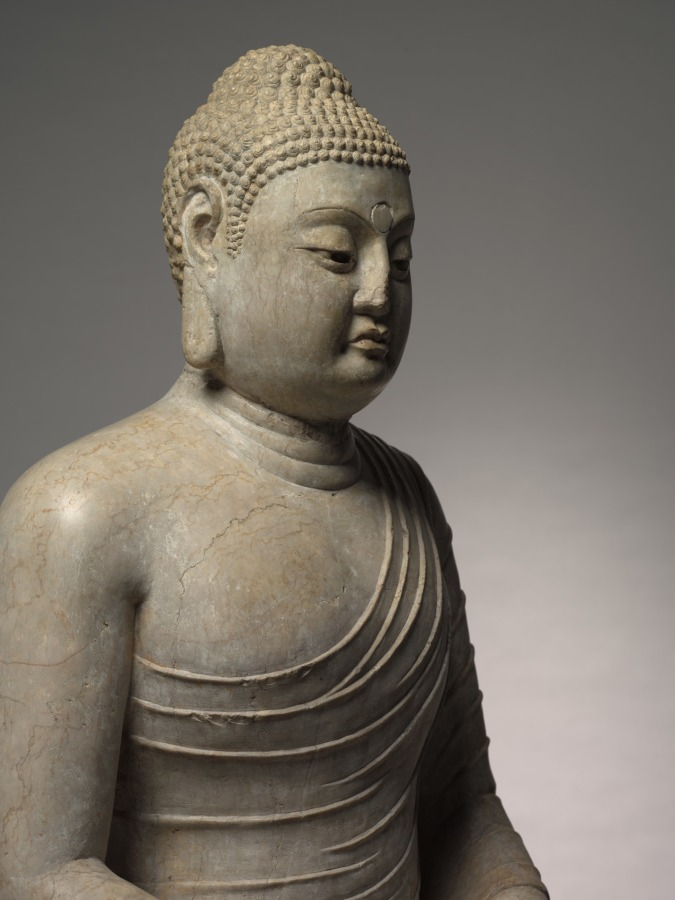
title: Seated Amitayus Buddha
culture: China, Northern Qi dynasty (550-577)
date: c. 570s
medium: marble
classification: Sculpture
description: Amitayus, the Buddha of Infinite Life, is seated in meditation on a double lotus pedestal. The pedestal was not made with the statue but the combination is faithful to the original artistic conception. The statue is an extremely rare example of a major type of Northern Qi Buddhist sculpture. The heavy, massive front highlights the sense of monumentality and the spiritual essence of the Buddha. Today the sculpture is united with a pedestal that exhibits the rich, ornate style of early Tang sculpture. It was commissioned by the Duke of Liang, Fang Xuanling (578–648), for the blessing of his second son and daughter-in-law, the Tang imperial princess of Gaoyang. The iconography and inscription suggest that it originally went with a statue, now missing, of Shakyamuni, the historical Buddha, instead of Amitayus.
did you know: The stringlike folds of the Buddha's draperies emphasize his monumental, rigidly erect torso and tubular limbs.